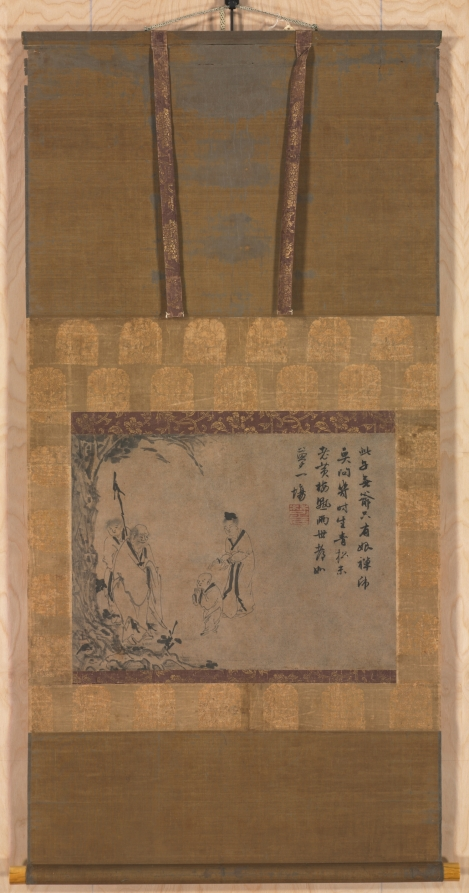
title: The Second Coming of the Fifth Patriarch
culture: China, Yuan dynasty (1271-1368)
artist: Yintuoluo (Chinese, c. 1285-c. 1355)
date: c. mid-1300s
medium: section of a handscroll mounted as a hanging scroll, ink on paper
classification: Painting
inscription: [印] 人言洞裡桃花源，未必人間有此枝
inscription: 此子無爺只有娘，禪師莫問幾時生。 青松未老黃梅飄，兩世都如夢一場。 [印] 楚石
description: A small boy, accompanied by his mother, is closing his hands in greeting to an old monk who has a young attendant standing behind him. Scholars believe the scene is a meeting between the fourth patriarch of Chan Buddhism, Daoxin 道信, and the little boy, who was the reincarnation of an old monk named Zaisong daozhe 栽松道者 (Pine Planter). They had encountered before, during which Daoxin advised the Pine Planter to endure a reincarnation as he was too old to reach enlightenment. This painting is done by Yintuoluo, an artist renowned for his simple and unadorned style.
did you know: This painting is just a section of a handscroll that has been remounted as a hanging scroll.